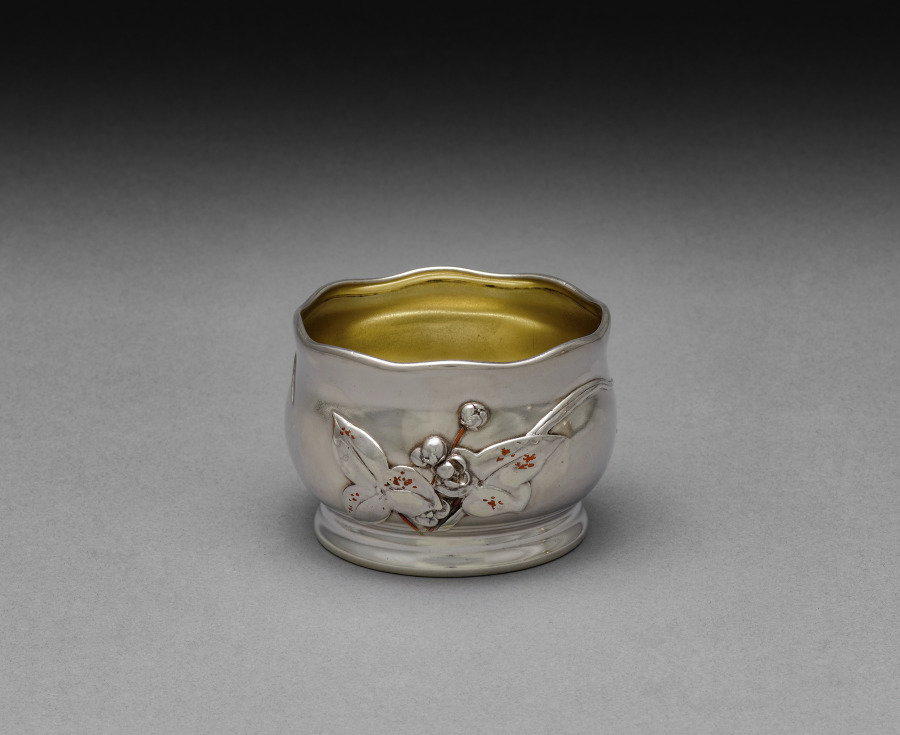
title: Sugar Bowl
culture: America, New York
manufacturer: Tiffany & Co. (America, New York, est. 1837)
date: c. 1879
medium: silver inlaid with copper and gold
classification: Silver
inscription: engraved: E.J.W.B./from/A.M./Xmas 1879. (The A.M. may refer to Alfred Morrison, a wealthy man who supported contemporary decorative arts by collecting them for his London house.)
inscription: Stamped underside: "Tiffany + Co.\ 5401 M 2987\ Sterling-silver\ and-\ other\- metals\ 909"